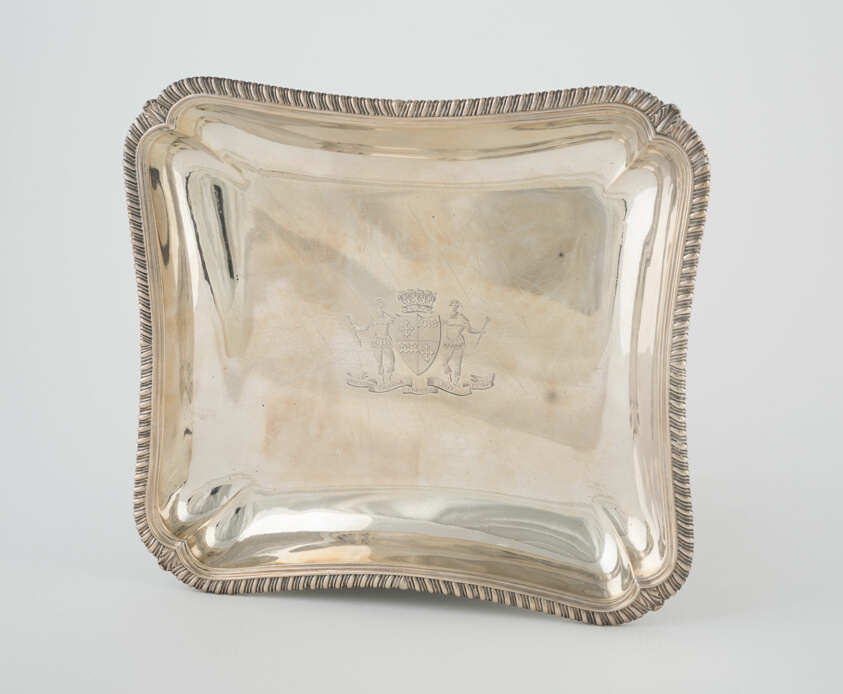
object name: Metalwork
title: Dish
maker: London, England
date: 1809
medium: Silver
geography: London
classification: dish (vessel); silver; metalwork; european decorative arts